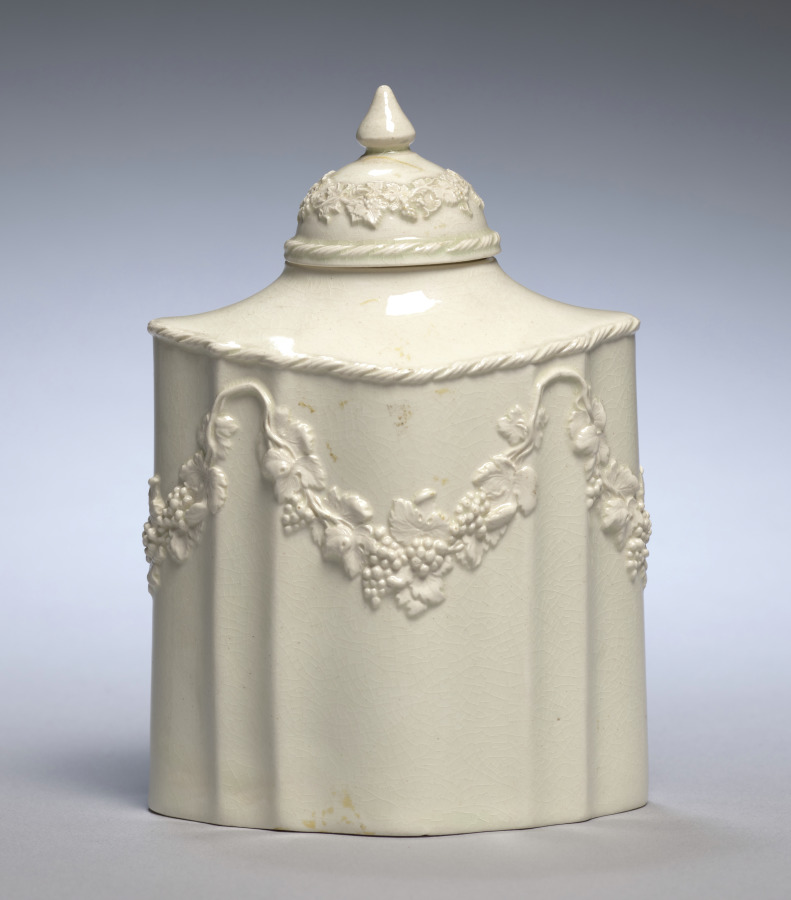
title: Teacaddy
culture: England, Staffordshire, 18th century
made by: Wedgwood Factory (British)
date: late 1700s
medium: cream-colored earthenware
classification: Ceramic